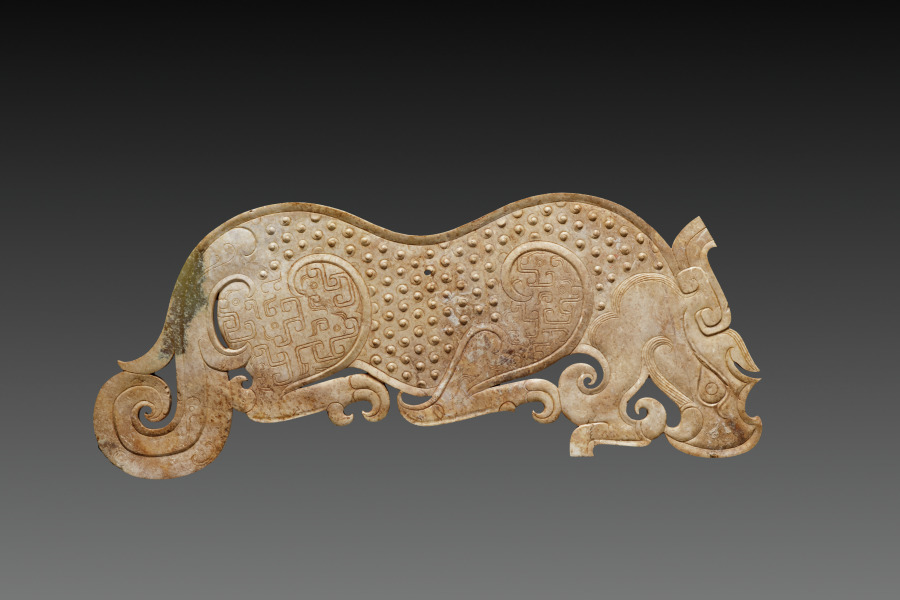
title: Jade Plaque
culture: China, Henan province, Eastern Zhou dynasty (770–256 BCE), Warring States period (475–221 BCE)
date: 475–221 BCE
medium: nephrite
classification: Jade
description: This beautiful pair of late Eastern Zhou openwork jade plaques illustrate a level of creativity and technical achievement that was unequaled before or since. Taking the shape of a pair of fantastic creatures, they are at once tigerlike, rhinolike, and dragonlike. Their strong silhouettes are marked with shallow relief bands, and their subtly swelling embellished surfaces are finished to the same degree on both sides.